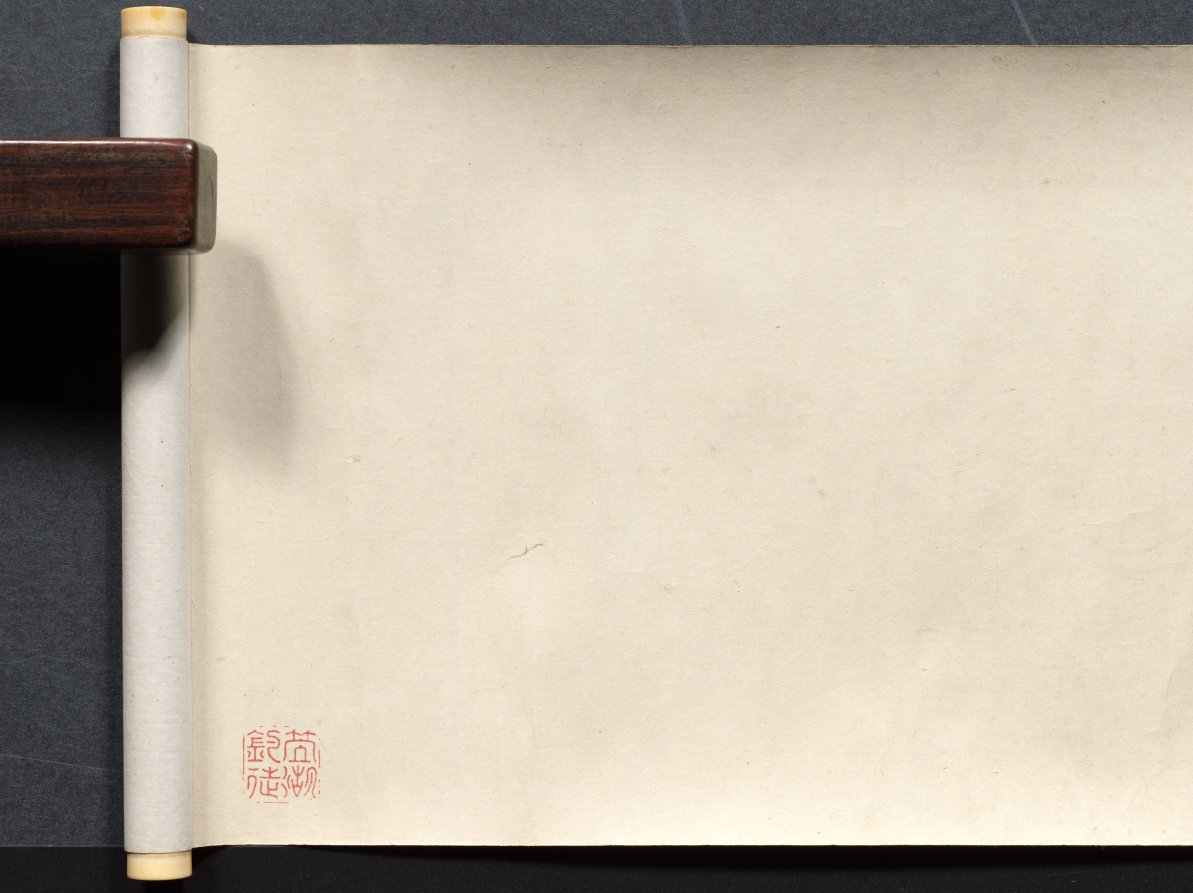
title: The Shadow Dancers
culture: Japan, Edo period (1615–1868)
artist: Yamamoto Baiitsu (Japanese, 1783–1856)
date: 1800s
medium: handscroll, ink and color on silk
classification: Painting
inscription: artist's signature and two seals at end of painting.